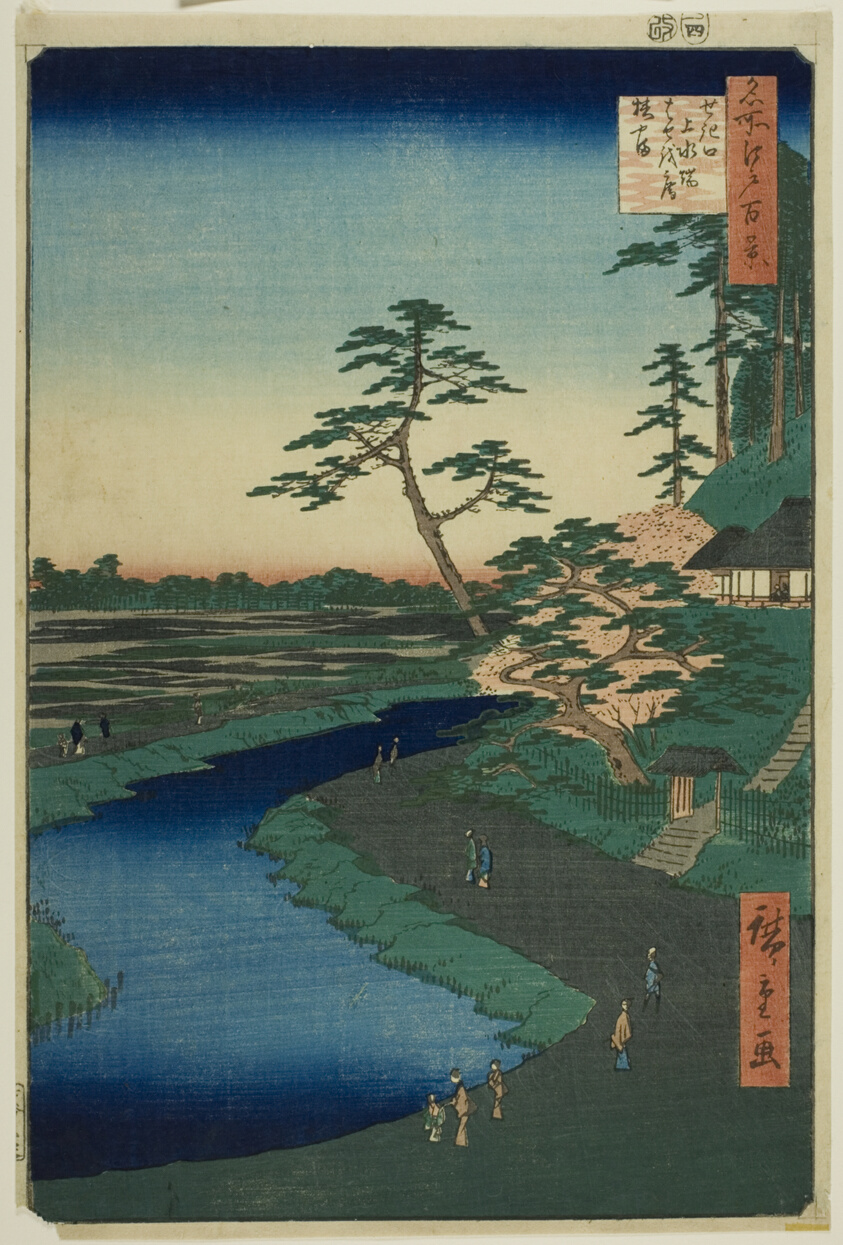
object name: Print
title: Basho's Hut on Camellia Hill Beside the Aquaduct at Sekiguchi, from the series "One Hundred Famous Views of Edo (Meisho Edo hyakkei)"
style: Japanese (culture or style)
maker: Utagawa Hiroshige 歌川 広重; Japanese, 1797–1858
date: 1857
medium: Color woodblock print; oban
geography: Japan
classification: woodblock print; print